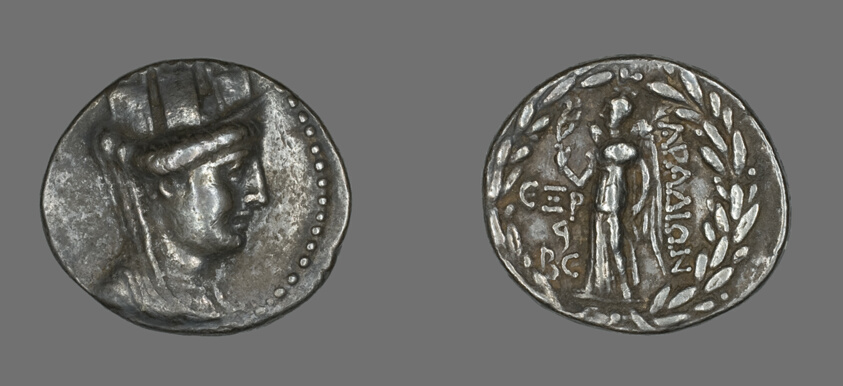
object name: Coin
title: Tetradrachm (Coin) Depicting Tyche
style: greek, ancient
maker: Greek; Arados, Phoenicia (Syria)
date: 95-94 BCE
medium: Silver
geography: Ancient Greece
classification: coin; ancient art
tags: goddesses